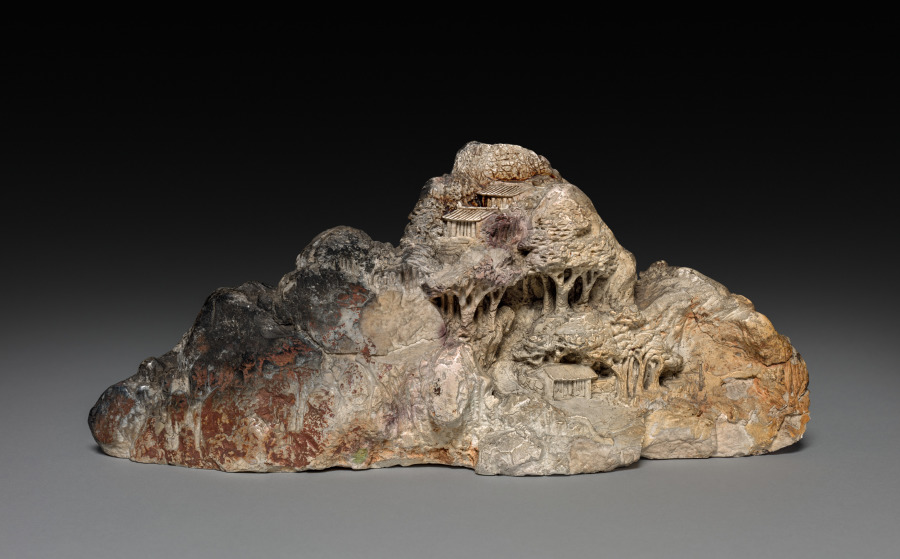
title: Mountain and Landscape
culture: China, Qing dynasty (1644-1911)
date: 1800s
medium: carved stone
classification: Jade